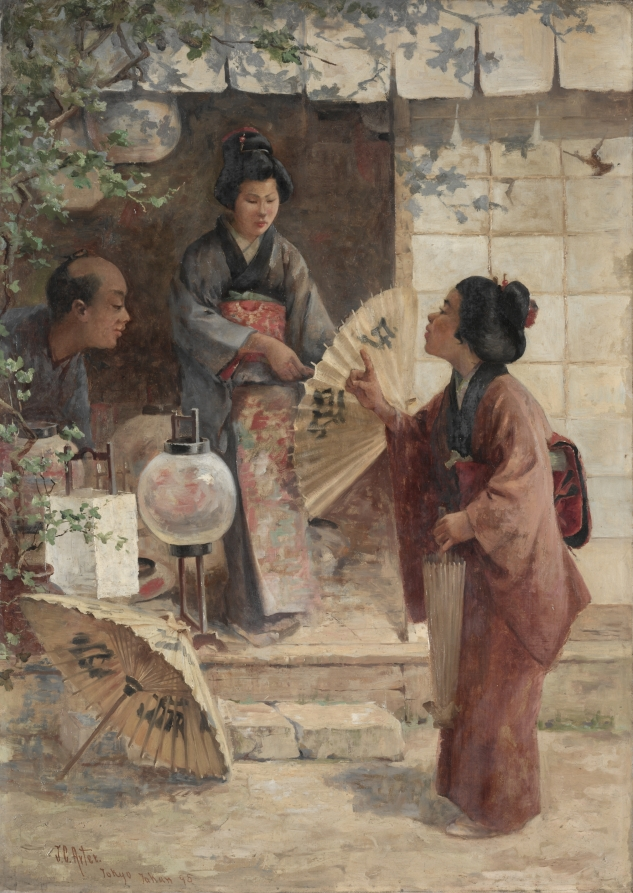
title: The Last Price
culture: America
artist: J. C. Arter (American, 1859–1923)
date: 1895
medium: oil on canvas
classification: Painting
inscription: signed lower left: J. C. Arter. / Tokyo / Japan 95